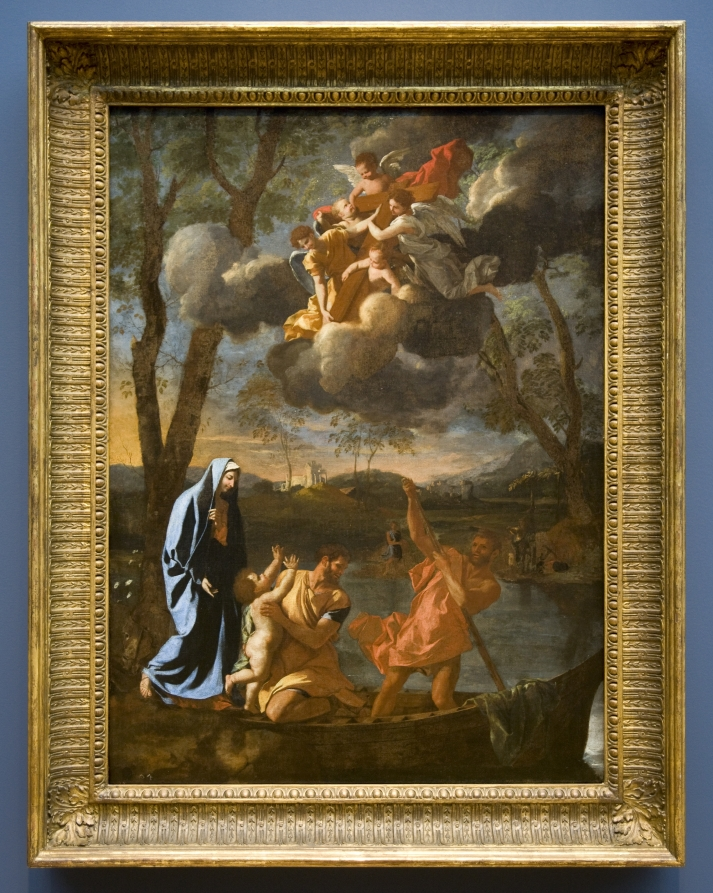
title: The Return of the Holy Family to Nazareth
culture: France, 17th century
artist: Nicolas Poussin (French, 1594–1665)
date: c. 1627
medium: oil on canvas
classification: Painting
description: When King Herod learned that he would lose his throne to a child born in Bethlehem, he ordered all male infants to be massacred. Mary and Joseph thus fled to Egypt to protect their son, Jesus. The age of the boy in this painting suggests that Poussin depicted the less-common subject of the Holy Family’s return from Egypt. Jesus reaches toward a vision of a cross borne by angels, a reference to both his eventual crucifixion and Herod’s cruel slaughter of innocent children.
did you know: Nicolas Poussin used wax figures and wetted paper or fabric to model the bodies in his paintings, helping him to capture the realistic folds, movement, and balance of light and shadow.